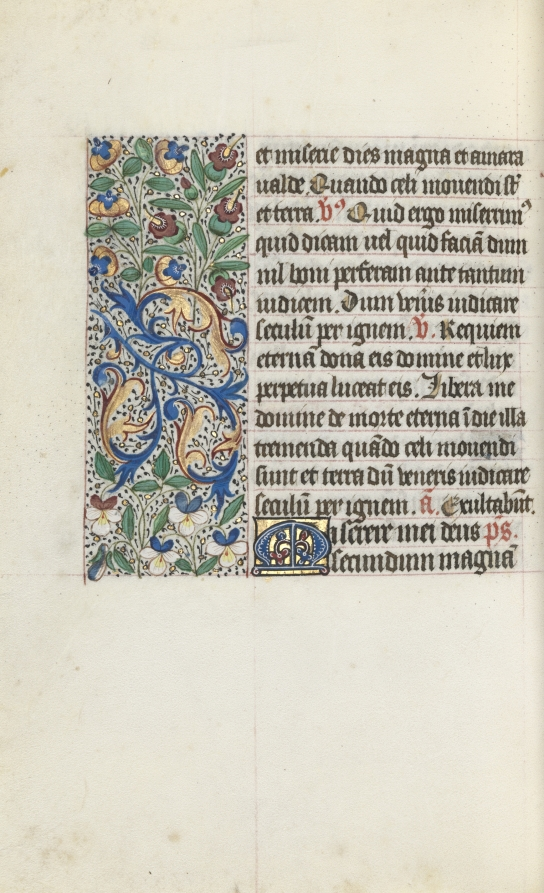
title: Book of Hours (Use of Rouen): fol. 133v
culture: France, Rouen, 15th century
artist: Master of the Geneva Latini (French, active Rouen, 1460–80)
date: c. 1470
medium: ink, tempera, and gold on vellum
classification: Bound Volume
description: In the late 1400s and early 1500s Rouen was an established and important center of book production. The city’s cathedral had a wealthy chapter that spent large sums of money to commission books and to maintain its extensive library. The stationers and booksellers would have likely been concentrated in or near the cathedral precinct. This artist, named after a manuscript now in Geneva, was Rouen’s principal illuminator during the second half of the 1400s.